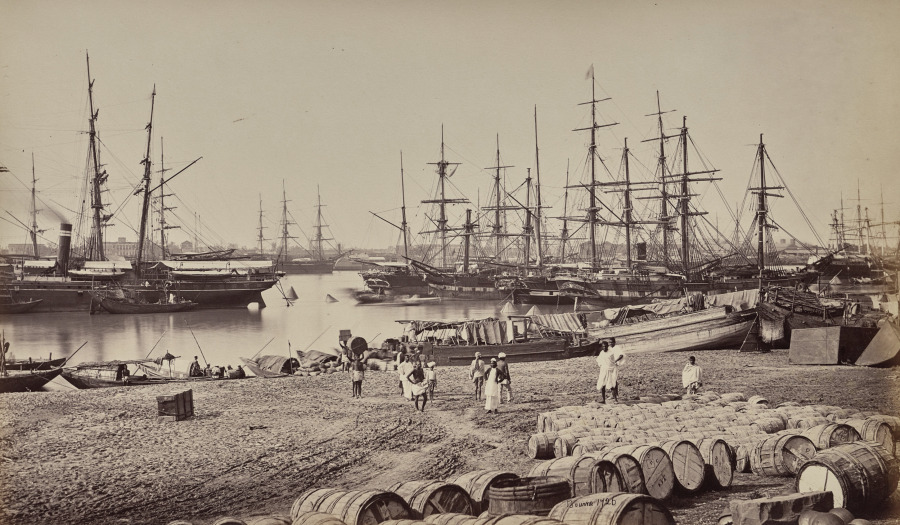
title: Calcutta. The Custom House Landing Place. Shipping in the River Hoogly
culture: England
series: Photographs of Northern India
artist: Samuel Bourne (British, 1834–1912)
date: 1863–70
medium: albumen print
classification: Photograph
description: The 50 images in this album, all taken in the 1860s, move from the hill towns of the Himalayas down to cities including Lahore (now in Pakistan), Delhi, Lucknow, Agra, Benares (now Varansi), and Calcutta (now Kolkata). Architectural studies of major monuments offer valuable historical records of what sites such as the Taj Mahal and the imperial mosque of the Mughal emperors in Delhi looked like before 20th-century restorations.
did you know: Samuel Bourne, the author of most the images in this album, was a banker in England before he moved to India to become a professional photographer.